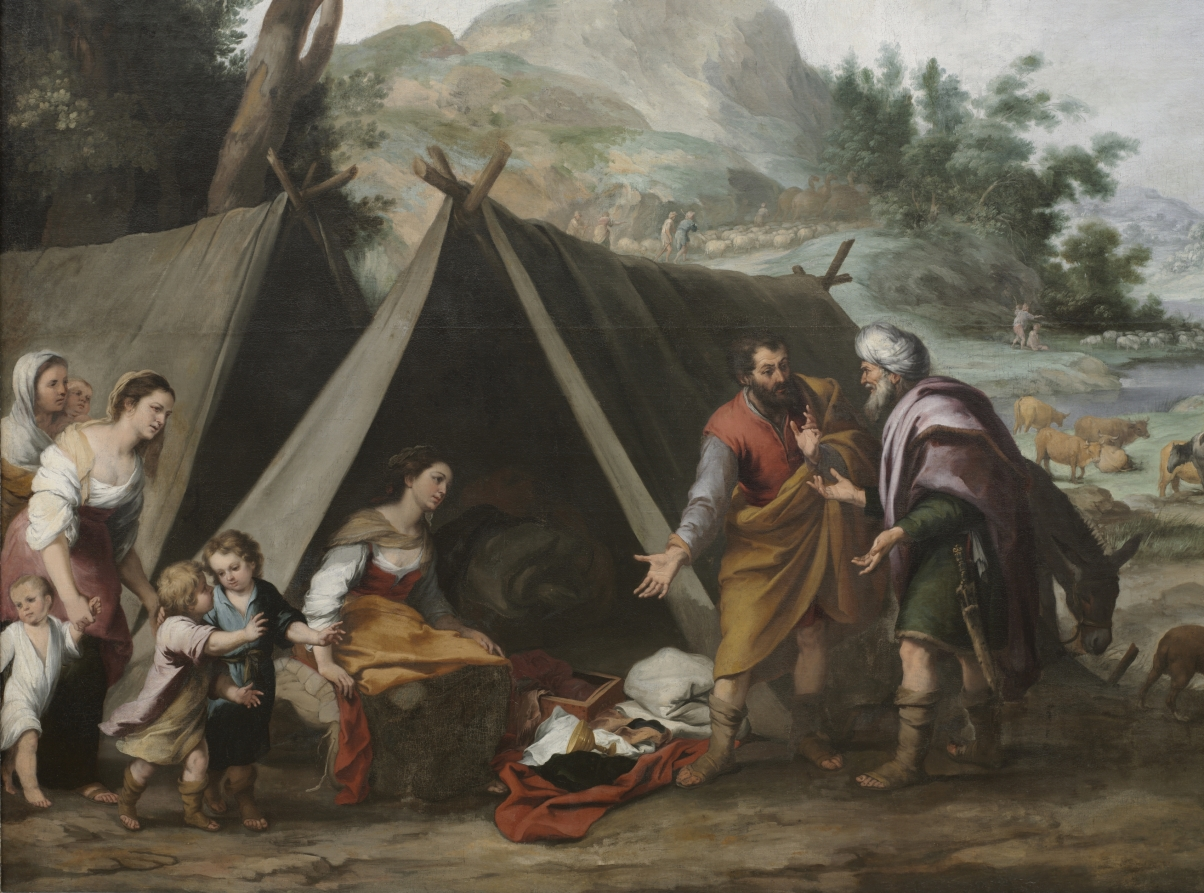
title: Laban Searching for His Stolen Household Gods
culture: Spain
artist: Bartolomé Esteban Murillo (Spanish, 1617–1682)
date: c. 1665–70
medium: oil on canvas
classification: Painting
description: This story comes from the Old Testament book of Genesis and stresses the value of reconciliation. Jacob lived with his uncle Laban for years, marrying Laban’s daughters Rachel and Leah. When the relationship between the men soured, Jacob and his family departed, while Rachel secretly stole her father’s household gods. When Laban discovered that the statues were missing, he pursued Jacob, accusing him of theft. Here, Jacob invites Laban to search his tent, while Rachel sits on the saddlebag containing the statues. After coming up empty-handed, Laban proposes a truce, ending the squabble.